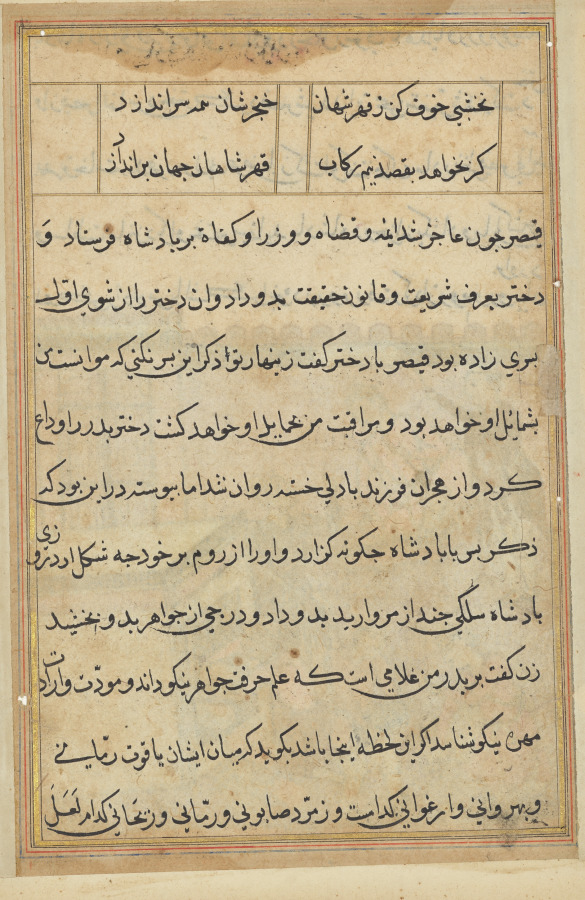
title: Page from Tales of a Parrot (Tuti-nama): text page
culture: Mughal India, court of Akbar (reigned 1556–1605)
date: c. 1560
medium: gum tempera, ink, and gold on paper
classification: Painting